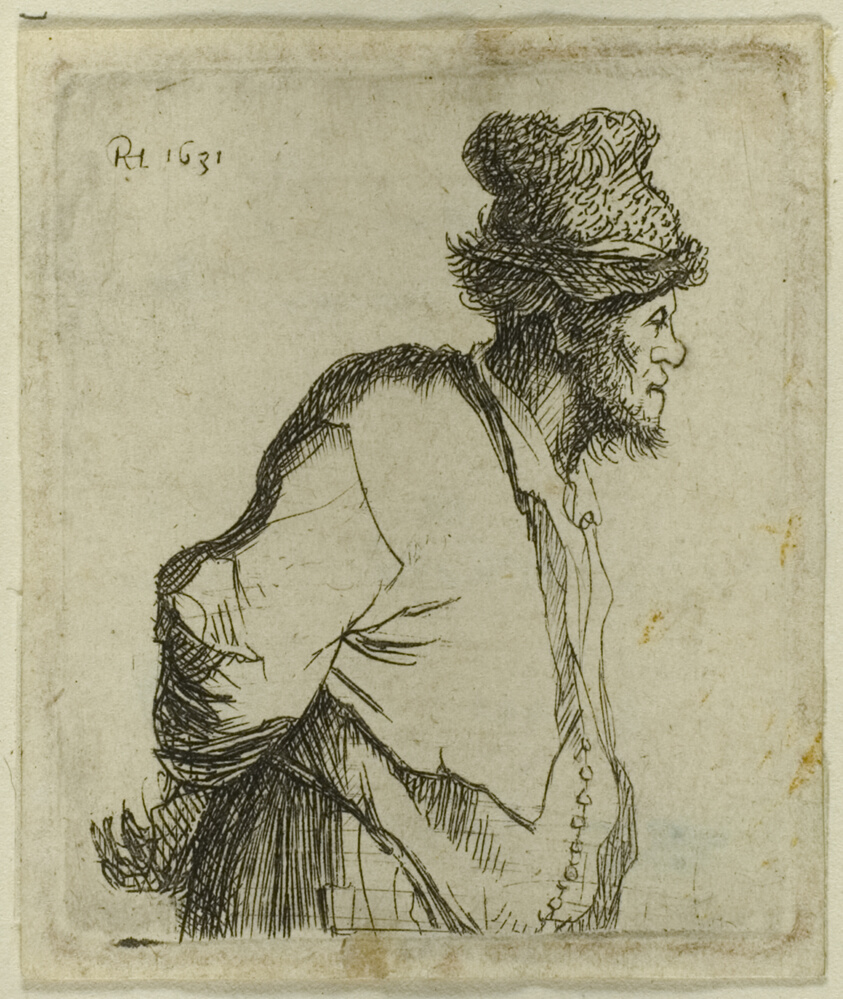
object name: Print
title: Peasant with His Hands Behind His Back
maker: Rembrandt van Rijn (Dutch, 1606-1669)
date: 1629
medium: Etching on ivory laid paper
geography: Holland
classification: etching; print; prints and drawing; paper